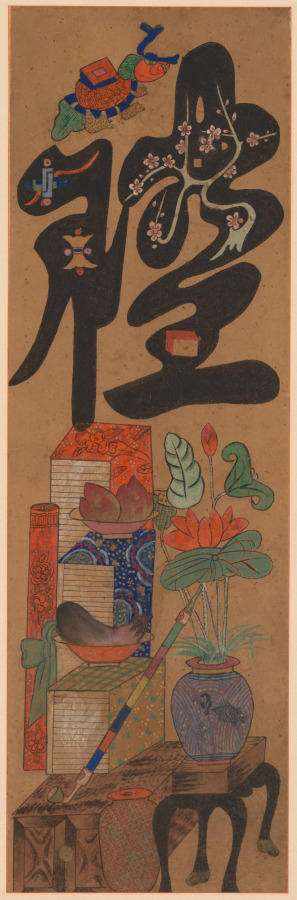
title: Munja-Chaekgeori Screen (Character-Books Screen)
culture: Korea, Joseon dynasty (1392–1910)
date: early 1900s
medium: Eight-panel folding screen, ink on paper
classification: Painting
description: This folding screen is a whimsical harmony of two different subjects: chaekgeori, or books and things; and munja, or characters. The lower section of each panel depicts the imagery of things, including books, decorative arts, and utilitarian objects. The upper portion of each panel bears a classical Chinese character. Read from far right to left, the eight characters refer to the values of Confucian teachings of the Joseon dynasty: filial piety, brotherly love, loyalty, trust, propriety, righteousness, modesty, and humility. While these two pictorial genres are harmoniously conjoined on the same picture plane, two sharply contrasting world views—urban consumerism and traditional Confucian ethics that despise materialism—compete with one another.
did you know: The eight Korean characters each mean filial piety, brotherly love, loyalty, trust, propriety, righteousness or justice, modesty or integrity, and humility or the feeling of shame.